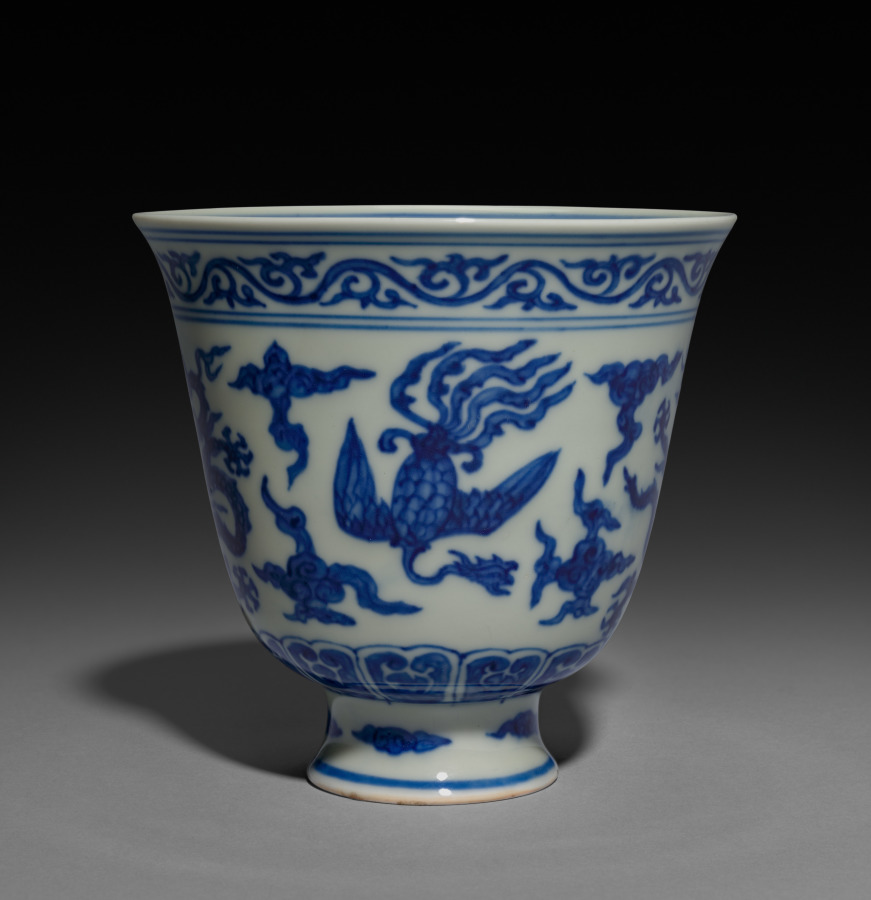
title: Cup with Dragons and Phoenixes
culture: China, Jiangxi province, Jingdezhen kilns, Ming dynasty (1368-1644), Jiajing mark and reign (1522-66)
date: 1522–66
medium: porcelain with underglaze blue decoration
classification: Ceramic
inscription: 大明嘉靖年製